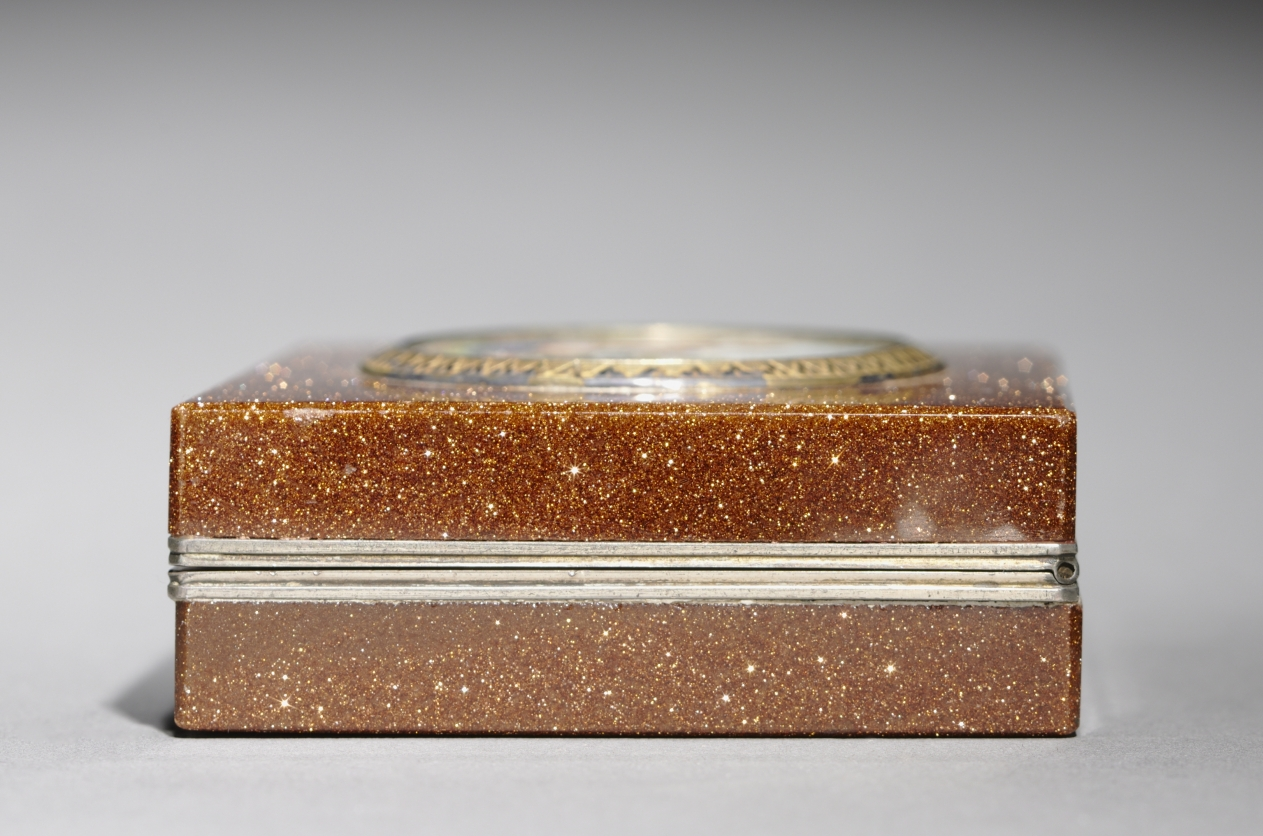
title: Snuff Box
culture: Italy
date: 1860–70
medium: goldstone, gold, micro mosaic glass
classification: Enamel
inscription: no marks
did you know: Hundreds of small glass tesserae make up the central image on the cover of this snuff box.